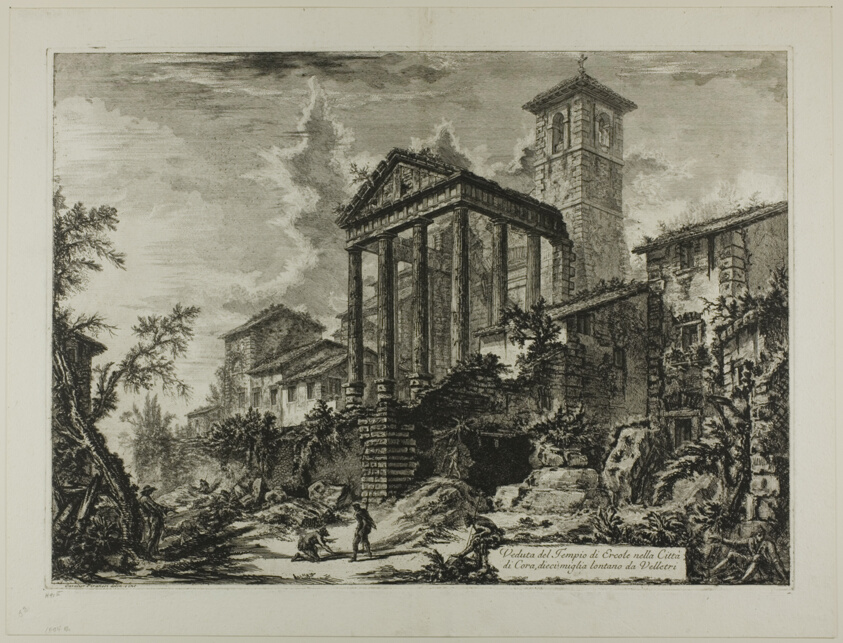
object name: Print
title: View of the Temple of Hercules at Cori, ten miles distant from Velletri, from Views of Rome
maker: Giovanni Battista Piranesi (Italian, 1720-1778); published by Francesco (Italian, 1758-1810) and Pietro Piranesi (Italian, born 1758/9)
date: 1769, published 1800–07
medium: Etching on heavy ivory laid paper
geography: Italy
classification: etching; print; prints and drawing